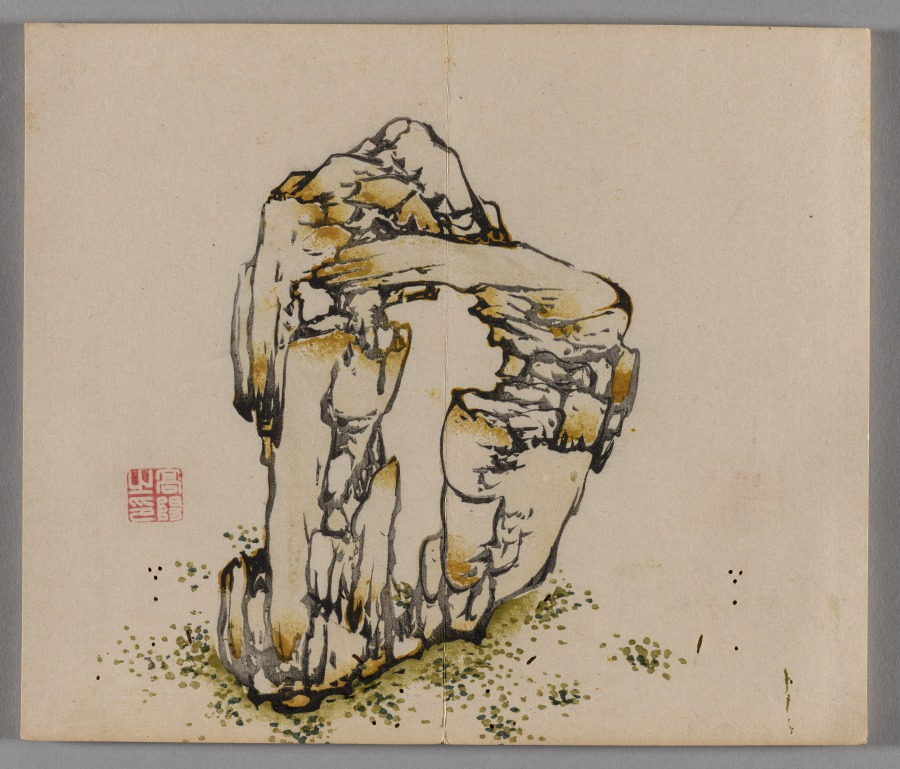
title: Ten Bamboo Studio Painting and Calligraphy Handbook (Shizhuzhai shuhua pu): Rocks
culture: China, Qing dynasty (1644-1911)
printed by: Hu Zhengyan (Chinese, c. 1584–1674)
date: 1633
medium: Woodblock-printed book; ink and colors on paper; first edition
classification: Print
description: Color printing reached a level of perfection in the early 1600s, as seen in this Ten Bamboo Studio Collection of Calligraphy and Painting and the Mustard Seed Garden Manual of Painting (printed 1679 and 1701). The painterly quality, precision in registering (aligning) the woodblocks, and harmonious colors made them the most successful color print editions in Chinese history. Both editions were printed and compiled in Nanjing, spread nationwide, and had a great impact on the arts in Japan and Korea.